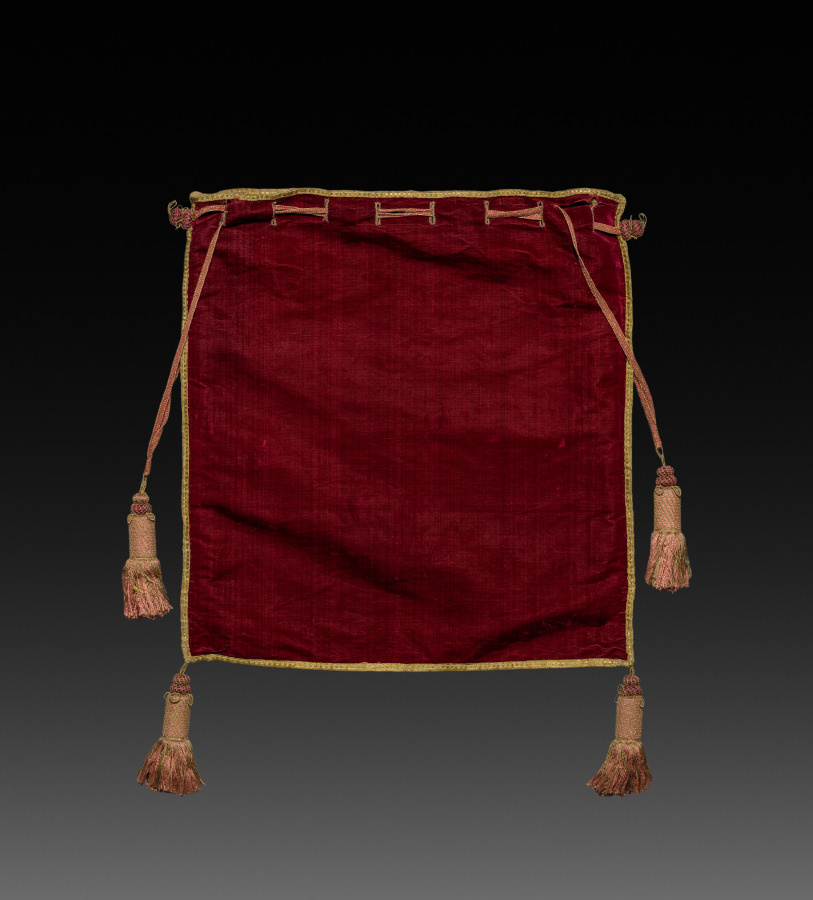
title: Cover for Lord Chancellor's Burse (Purse)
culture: England, 18th century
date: 1700s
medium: velvet; silk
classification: Velvet